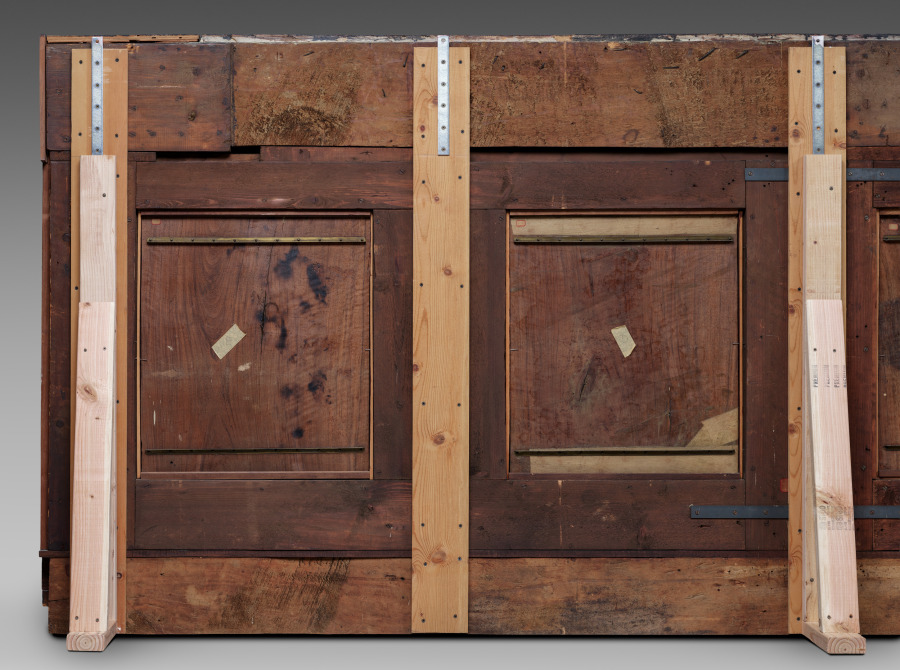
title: Upper Paneling from a Sacristy Armoire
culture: Italy, Florence, late 15th century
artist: attributed to Giuliano da Maiano (Italian, 1432–1490)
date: c. 1460–1475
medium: walnut, inlaid with holly and ebony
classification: Furniture and woodwork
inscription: in four of the five panels is the Medici badge of a jeweled ring wound with a ribbon or bannerole, on which is inscribed the motto "Semper." The frieze in the cornice contains part of a quotation from the Vulgate, Paul's epistle to the Romans, Chapter XI.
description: The imagery on the inset panels is the result of a technique known as intarsia, the skilled inlaying of woods of different colors to create a type of mosaic, popular during the 15th and 16th centuries in Italy for the decoration of paneling and furniture for studies, small rooms, and church sacristies. This large set of five intarsia panels comes from an unknown Florentine church. In its original setting the panels rested upon a row of similarly decorated cupboards (a sacristy armoire) which were used for the storage of liturgical vestments and books. This panel would have therefore been seen at eye level. The central panel depicts the Resurrection of Christ. The two outside panels depict the emblem of Lorenzo de Medici-three plumes encircled by a jeweled ring above a scrolling ribbon containing the Latin word SEMPER (Always). Lorenzo de Medici (1449-92) was the ruler of Florence when this sacristy armoire was constructed and was the likely patron. It seems to be the work of Giuliano da Maiano, an architect and intarsia-maker also responsible for the intarsia in the sacristy of Florence Cathedral.